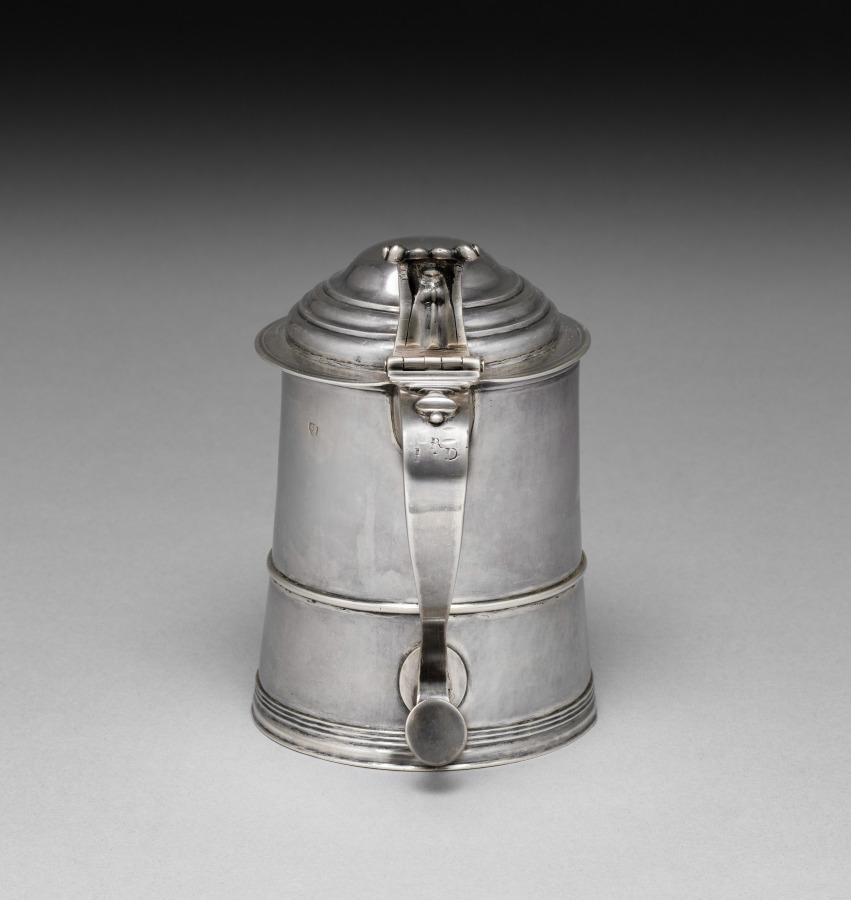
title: Tankard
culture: America, Massachusetts, Boston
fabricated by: Edward Winslow (American, 1669–1753)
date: c. 1725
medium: silver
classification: Silver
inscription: Engraved on handle: "R" over "I + D"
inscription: Stamped on side: "EV"